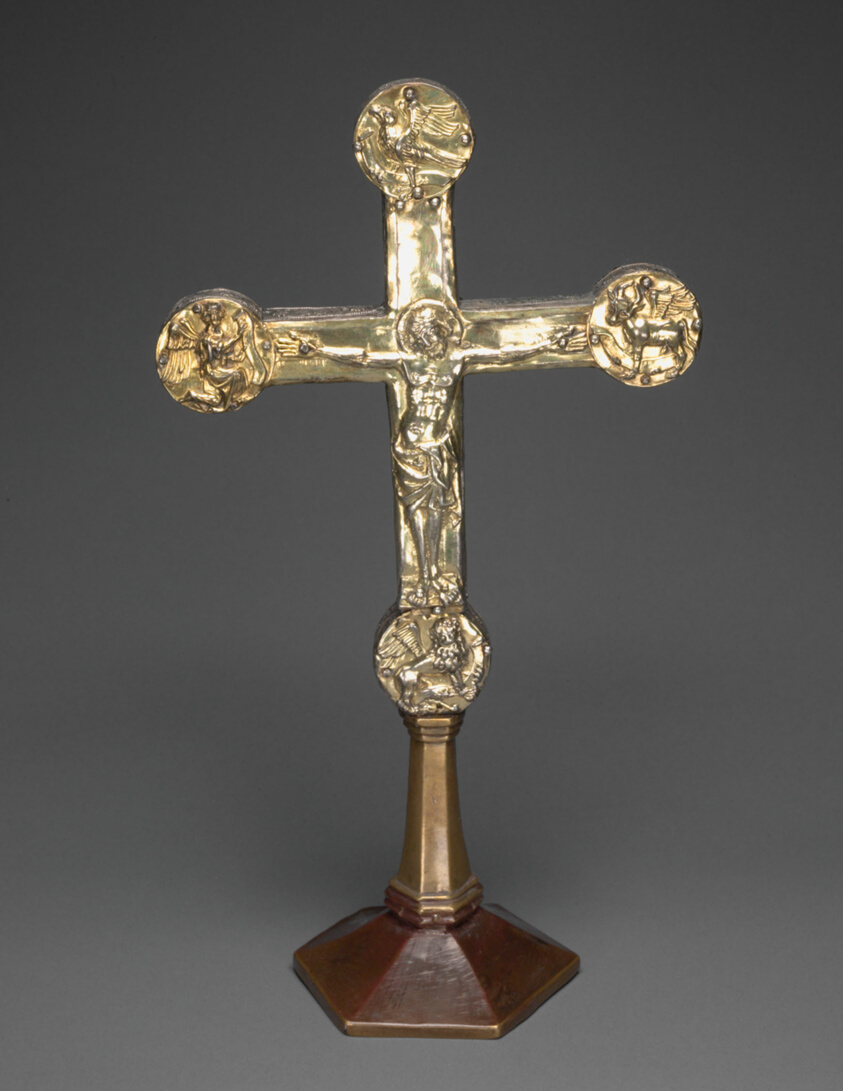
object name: Metalwork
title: Altar Cross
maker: German, probably Brunswick (Braunschweig)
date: c. 1325; foot: 15th century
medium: Silver gilt over a wooden core; foot: copper gilt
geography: Brunswick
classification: silver; metalwork; european decorative arts; decorative arts